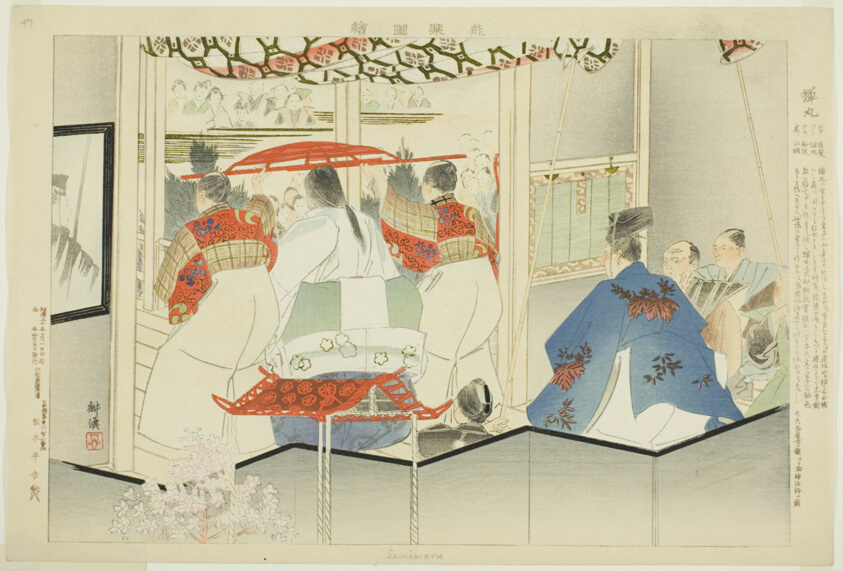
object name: Print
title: Semimaru, from the series "Pictures of No Performances (Nogaku Zue)"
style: Japanese (culture or style)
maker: Tsukioka Kogyo; Japanese, 1869-1927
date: 1898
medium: Color woodblock print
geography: Japan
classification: woodblock print; print; asian art